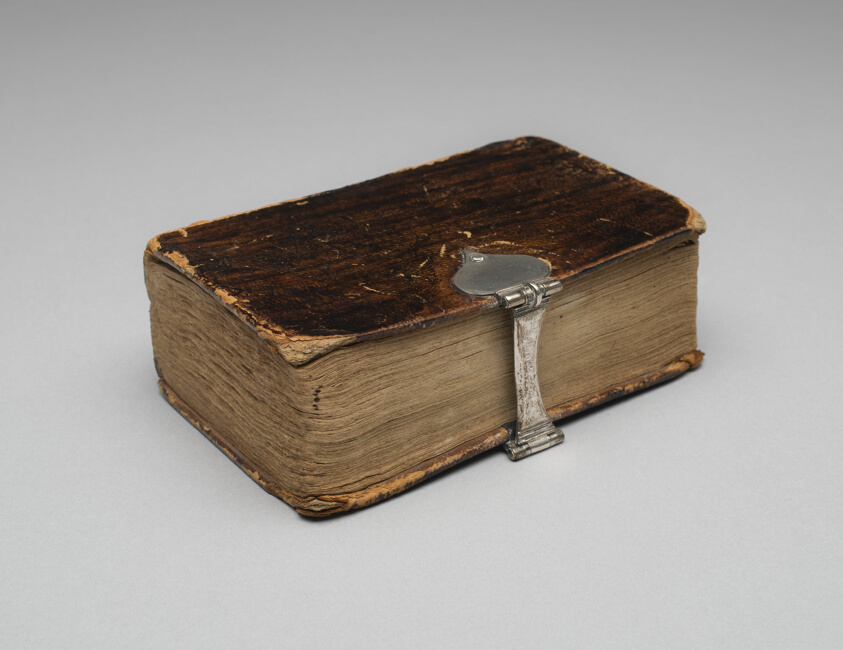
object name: Book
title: Book with clasp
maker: Artist unknown (American, 18th–19th century); Alexandria, Virginia; Written by John H. Livington (American, 1746–1825)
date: 1816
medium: Brown leather, with silver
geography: Alexandria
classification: book; silver; american decorative arts; american arts; decorative arts